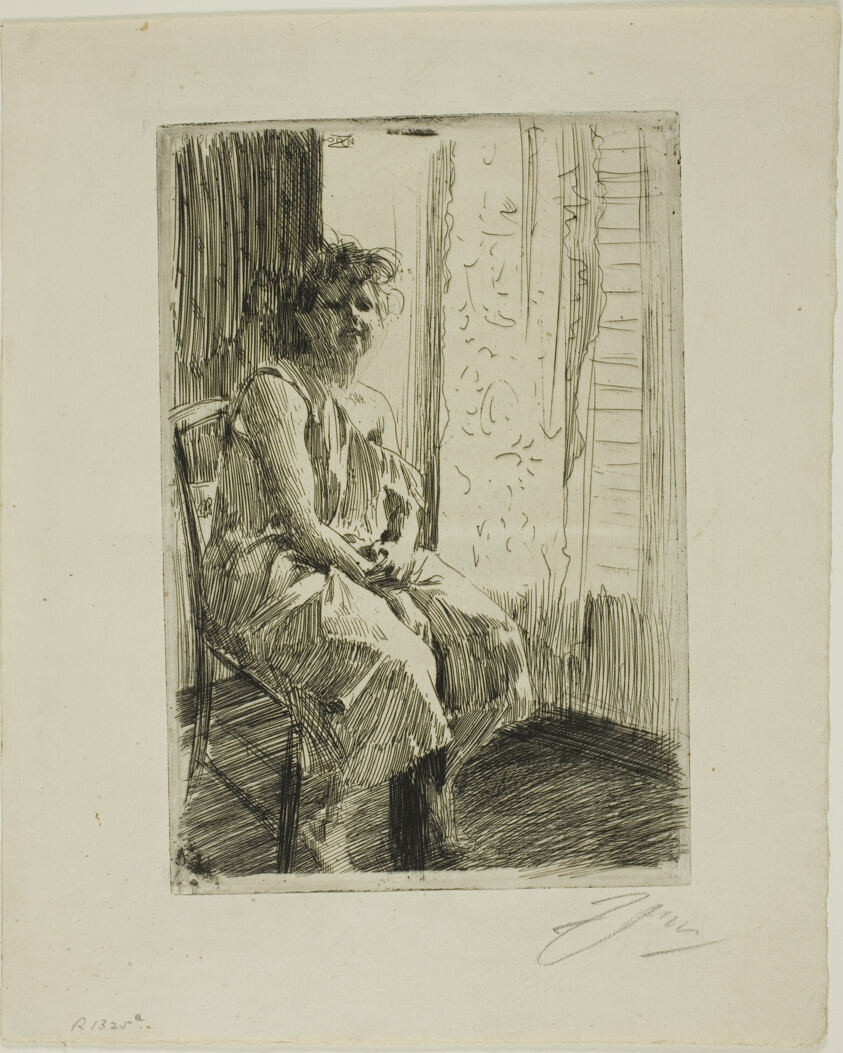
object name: Print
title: Morning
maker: Anders Zorn (Swedish, 1860-1920)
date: 1891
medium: Etching on ivory laid paper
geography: Sweden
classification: etching; print; prints and drawing